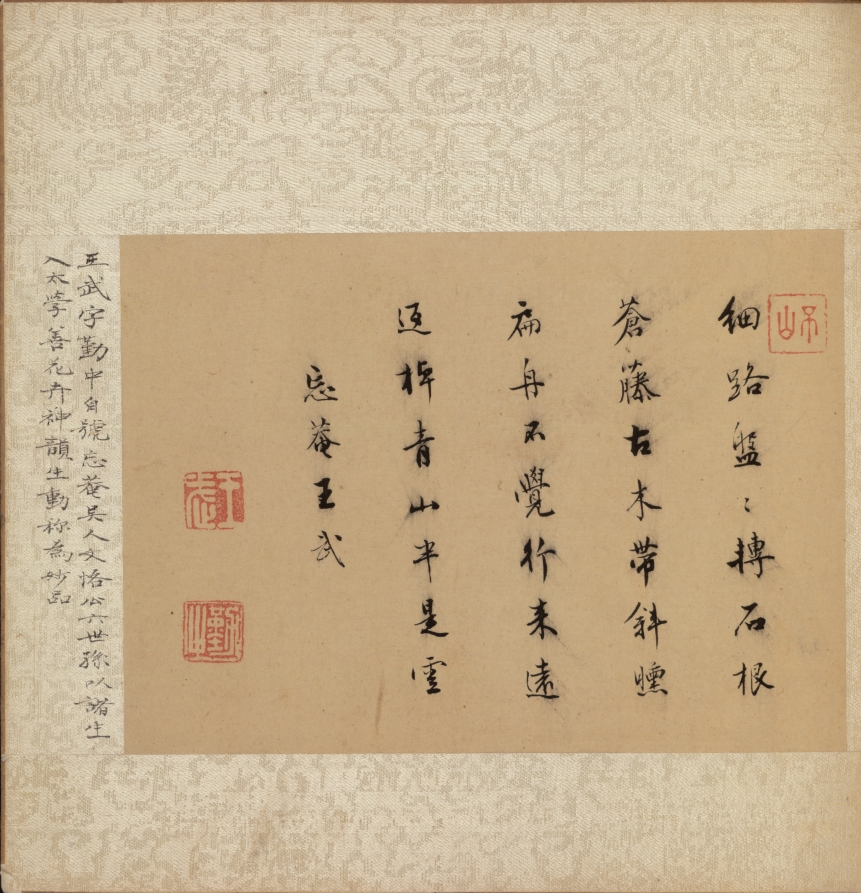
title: Album of Miscellaneous Subjects, Leaf 1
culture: China, Qing dynasty (1644-1911)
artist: Fan Qi (Chinese, 1616–after 1694)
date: early 1650s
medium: album cover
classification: Painting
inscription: Artist seal: Fan Qi 樊圻. Poem by Wang Wu 王武 (1632–1690): A narrow path coiling, winds across rock foundations;/ Old vines and ancient trees meet the sunset's slanting rays./ Unaware that my small boat has gone so far,/ By the time it reverses its oars, the green mountains will be half-covered with clouds.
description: Fan Qi's painting on leaf one may be inspired by Tang dynasty poet's Li Bai's line: A small boat has sailed through ten thousand layers of hills. Wang Wu's colophon facing the painting reads: A narrow path coiling, winds across rock foundations; Old vines and ancient trees meet the sunset's slanting rays. Unaware that my small boat has gone so far, By the time it reverses its oars, the green mountains will be half-covered with clouds.